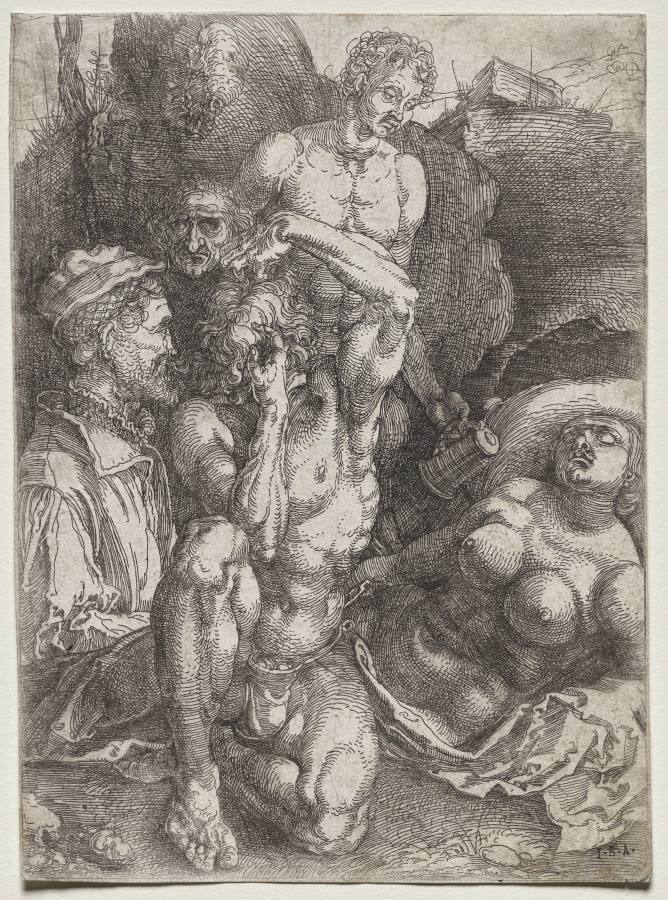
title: Group of Five Figures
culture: Germany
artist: Albrecht Dürer (German, 1471–1528)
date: c. 1515–16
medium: etching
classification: Print